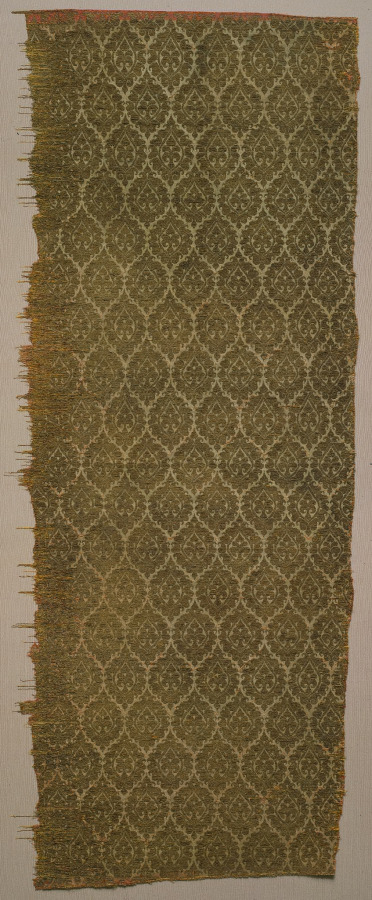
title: Textile with Palmettes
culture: Central Asia, Il-khanid (Mongol) period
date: 1200s–1300s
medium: Silk and gold thread; tabby with supplementary weft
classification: Textile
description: Designs of repeated ogives were popular in Central Asia and survive in a number of variations. Usually, the ogival frame encloses a floral motif, as in this example. Sometimes paired animals occur instead. Silks with this type of pattern were exported to Western Asia and to Europe, where they inspired textile designs woven locally. Mongol silks with exotic floral and animal patterns were acquired for use as clothing and furnishings by the clergy and nobility. They were also used by painters as models for hangings or garments.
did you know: Some of the original coral-red background can be seen along the edges, where it hasn't faded to off-white.